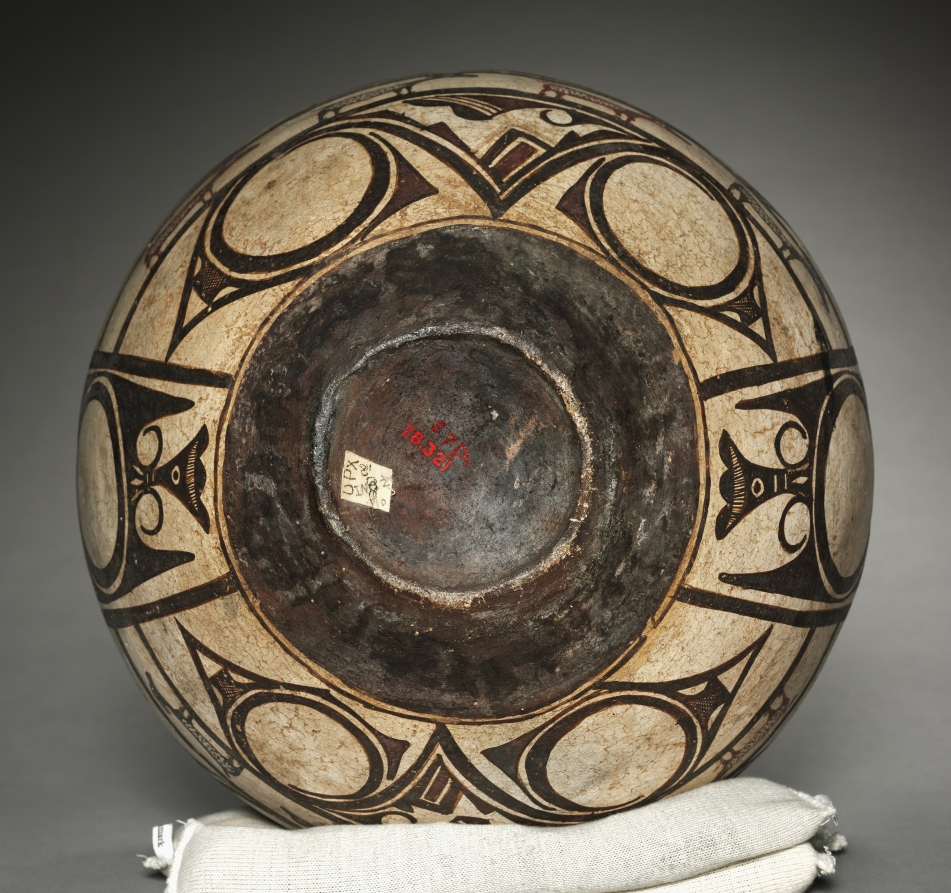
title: Water Jar (Olla)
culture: Southwest,Pueblo, Zuni, Post-Contact Period, late 19th century - early 20th century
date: 1880–1900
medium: ceramic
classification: Ceramic